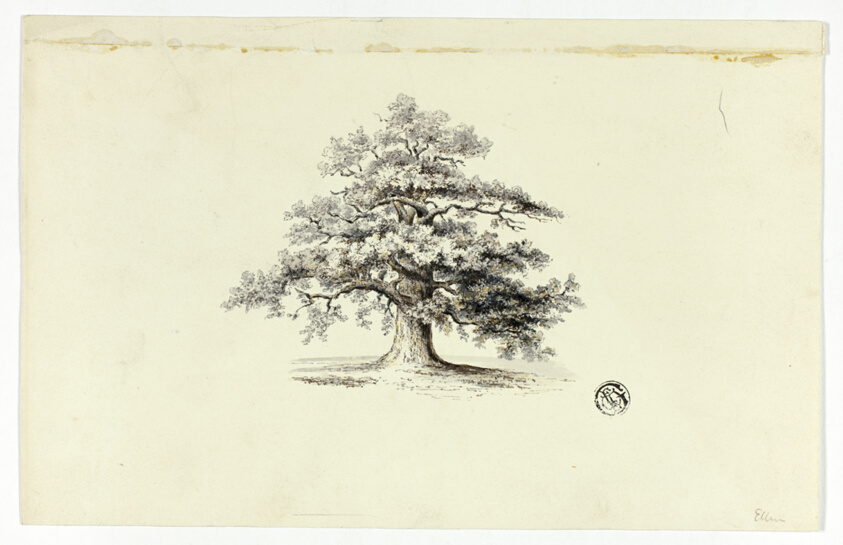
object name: Drawing and Watercolor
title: Oak Tree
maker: Unknown Artist; British, n.d.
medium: Pen and brown and black ink, with brush and gray wash, and touches of brush and yellow wash, on cream wove paper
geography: United Kingdom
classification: pen and ink drawings; drawings (visual works); prints and drawing